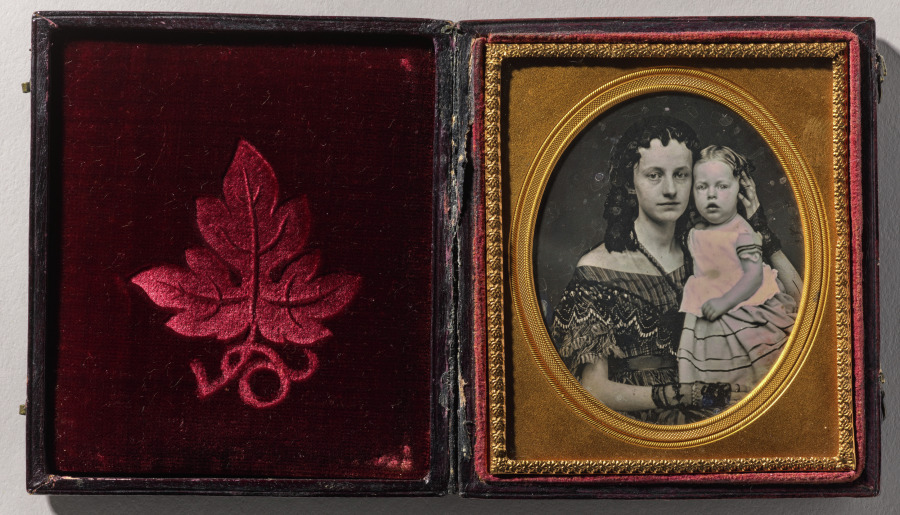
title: Mother and Child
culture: America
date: c. 1860–65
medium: daguerreotype, applied color, sixth-plate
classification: Photograph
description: Some of the most inventive and technically skilled practitioners in the early history of photography are as yet unidentified. However, with time more of these individuals will probably be recognized by name. Introduced into America soon after its invention in 1839 by the Frenchman Louis-Jacques-Mandé Daguerre, the daguerreotype flourished from 1840 to the mid-1860s. This beautiful daguerreotype in its original case is an outstanding example of a very popular subject: mother and child. The polished silver plate precisely renders in warm tones the likeness of the elaborately dressed sitters. The mother gently steadied the child's head so that it would not move during the long exposure required by the daguerreotype process. Clearly, the maker's knowledge of chemistry and traditional principles of design were necessary for this charming portrait.